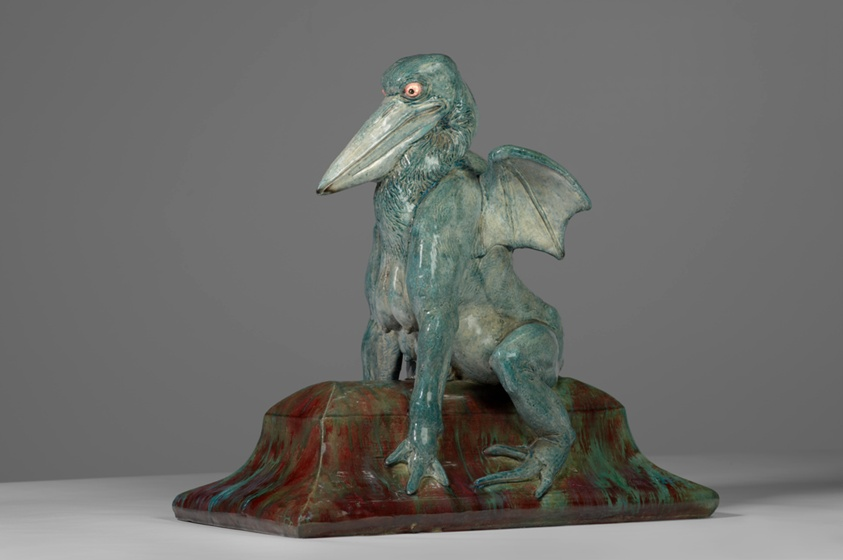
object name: Ceramics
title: Pelican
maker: Emmanuel Fremiet, French, 1824–1910; Made by Émile Muller et Cie, Ivry-sur-Seine, France, 1854–1908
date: c. 1896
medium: Glazed stoneware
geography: France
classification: sculpture; ceramics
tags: mythological figures, animals, bird, pelican, wings